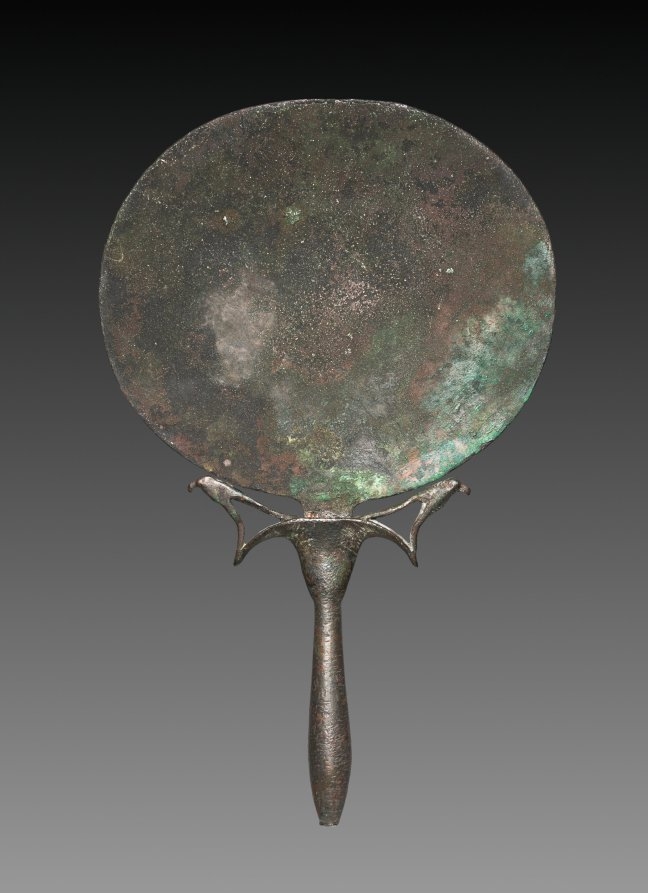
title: Mirror with Falcons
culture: Egypt, New Kingdom (1540–1069 BCE), Dynasty 18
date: 1540–1296 BCE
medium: mirror of copper, handle of tin-bronze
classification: Cosmetic Objects